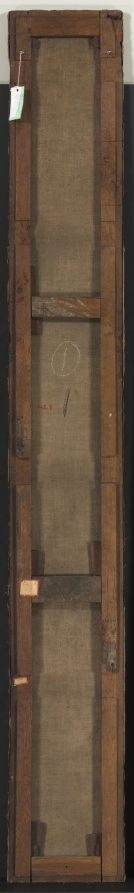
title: Decorative Panel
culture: France, 18th century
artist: Pierre Rousseau (French, 1751–1829)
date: 1790s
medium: oil on canvas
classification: Painting